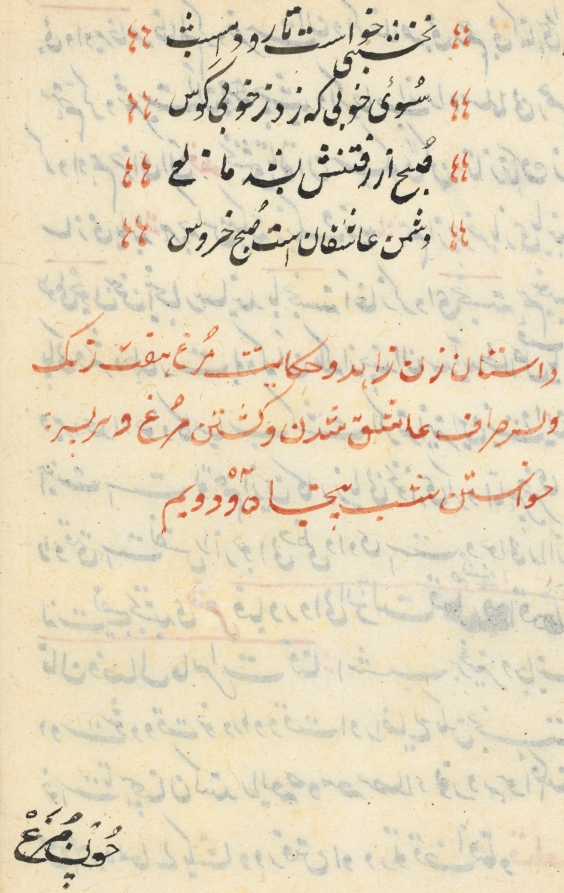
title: Page from Tales of a Parrot (Tuti-nama): text page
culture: Mughal India, court of Akbar (reigned 1556–1605)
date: c. 1560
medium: gum tempera, ink, and gold on paper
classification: Painting